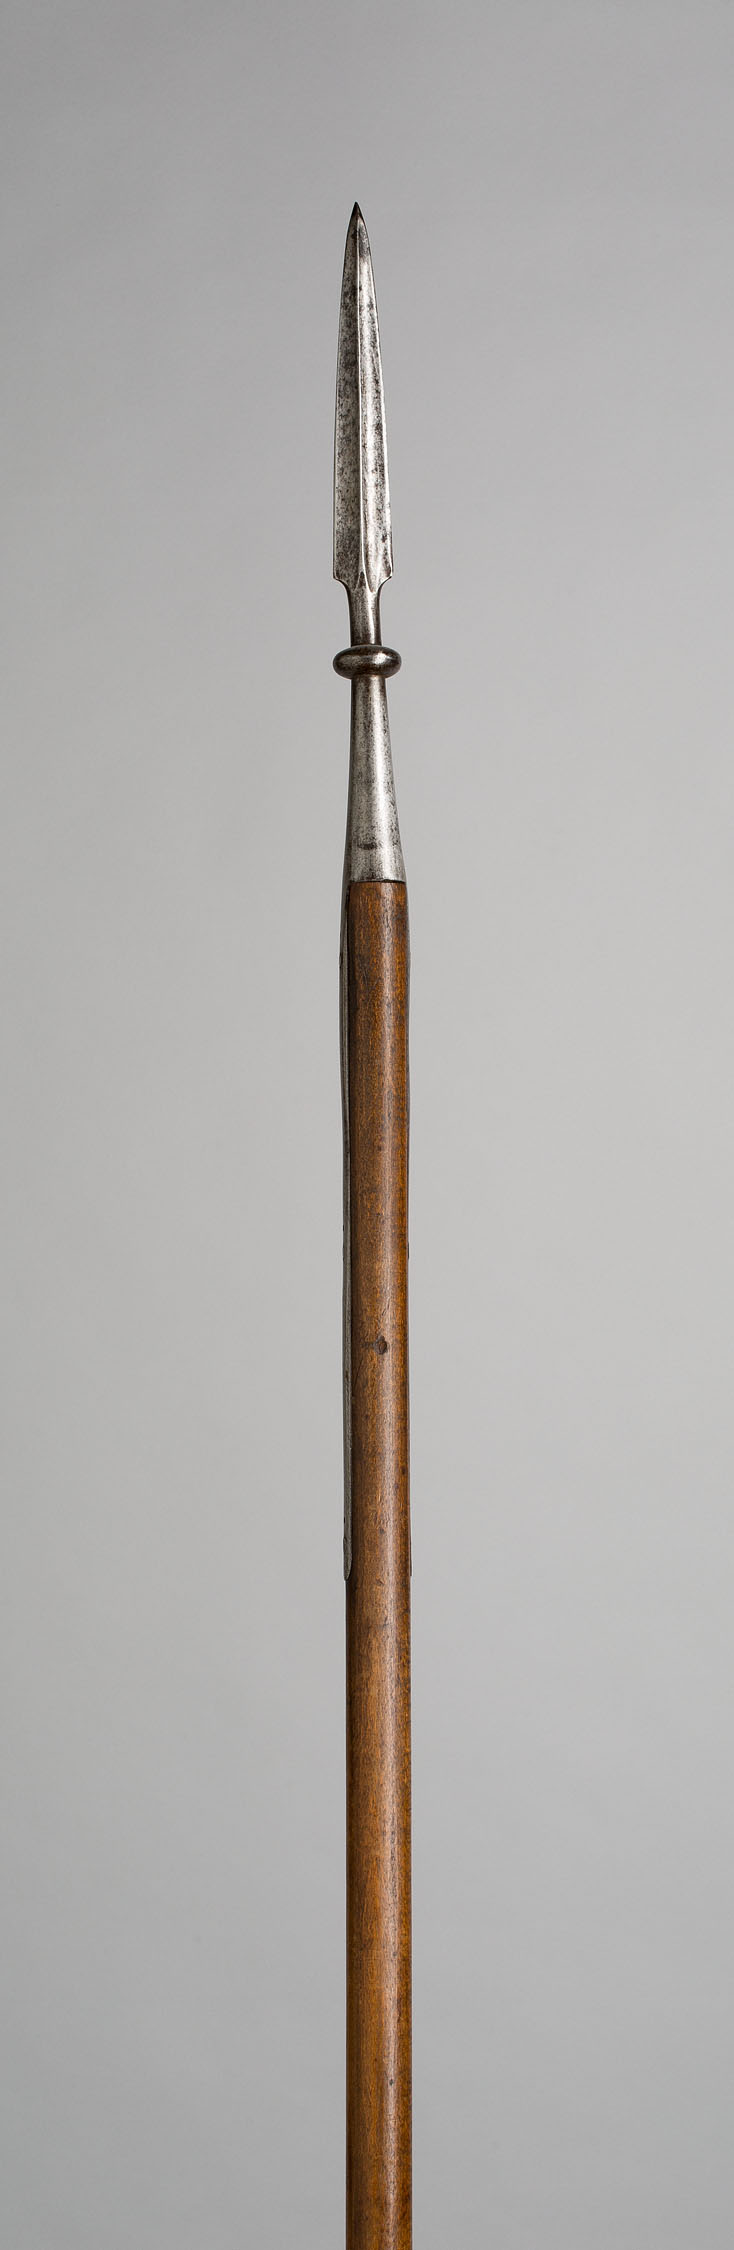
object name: Arms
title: Cavalry Lance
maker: European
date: 1700/1800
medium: Steel and wood (ash)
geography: Europe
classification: edged weapon-staff; arms; arms and armor